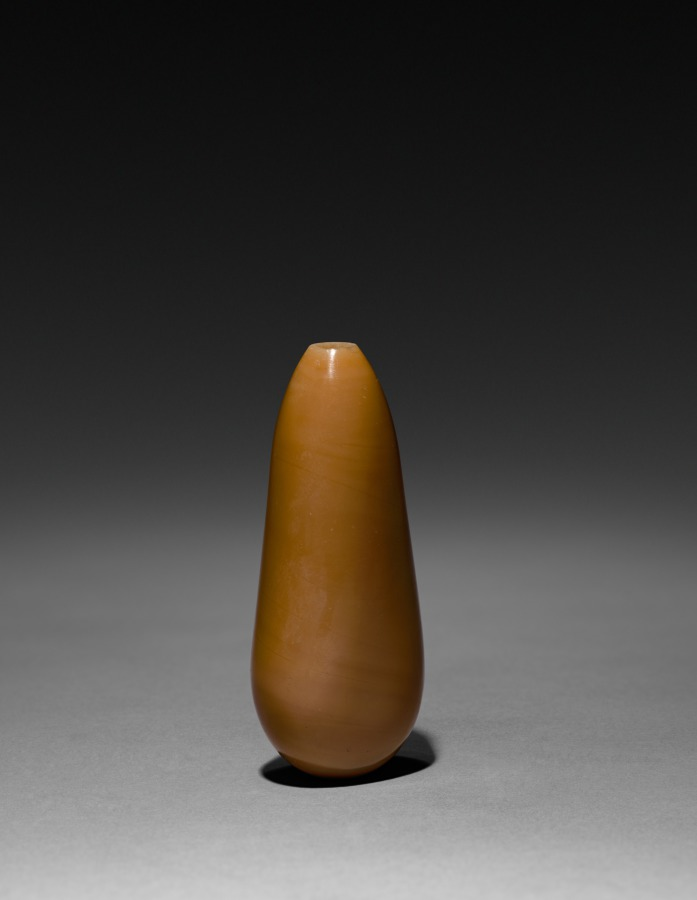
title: Snuff Bottle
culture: China, Qing dynasty (1644-1911)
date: 1644–1911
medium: glass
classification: Glass